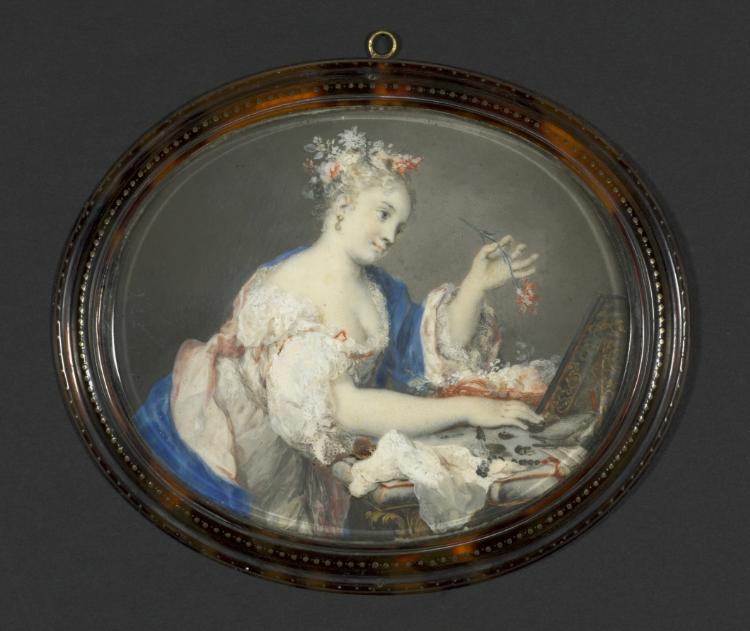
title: A Woman Putting Flowers in Her Hair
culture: Italy, 18th century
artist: Rosalba Carriera (Italian, 1675–1757)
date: c. 1710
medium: watercolor on ivory in a tortoiseshell pique-point frame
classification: Portrait Miniature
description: Scholars generally agree that Rosalba Carriera (1675-1757) developed the art of painting miniatures on ivory, in place of the traditional support of vellum, a fine animal skin. Although she became famous as a pastel painter, in her early career, Carriera decorated ivory snuff boxes-containers used to hold powdered tobacco taken by sniffing up the nostrils-for tourists. This miniature likely served as a lid to a snuff box, due to its elliptical shape in contrast to the oval or occasionally round shapes of most other miniatures. Although painters of ivory snuff boxes used watercolor, the same media artists used on vellum, the finished images on ivory were crude in comparison to those painted on vellum because ivory presents a greasy, non-absorbent surface, causing watercolor to run. Carriera revolutionized the art of watercolor painting on ivory through a process she termed her fondelli, or foundation. She developed a way in which to work in watercolor on ivory that emulated the soft powdery sophistication of her pastels. She used opaque gouache, essentially watercolor paint mixed with a gummy white, a combination of media which adhered to the oily surface of ivory. News of Carriera's innovation spread through Europe, and in the first few decades of the 1700s, most miniaturists abandoned vellum in favor of ivory.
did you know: Its extraordinary thickness indicates that this is one of Carriera's earliest experiments painting on ivory.